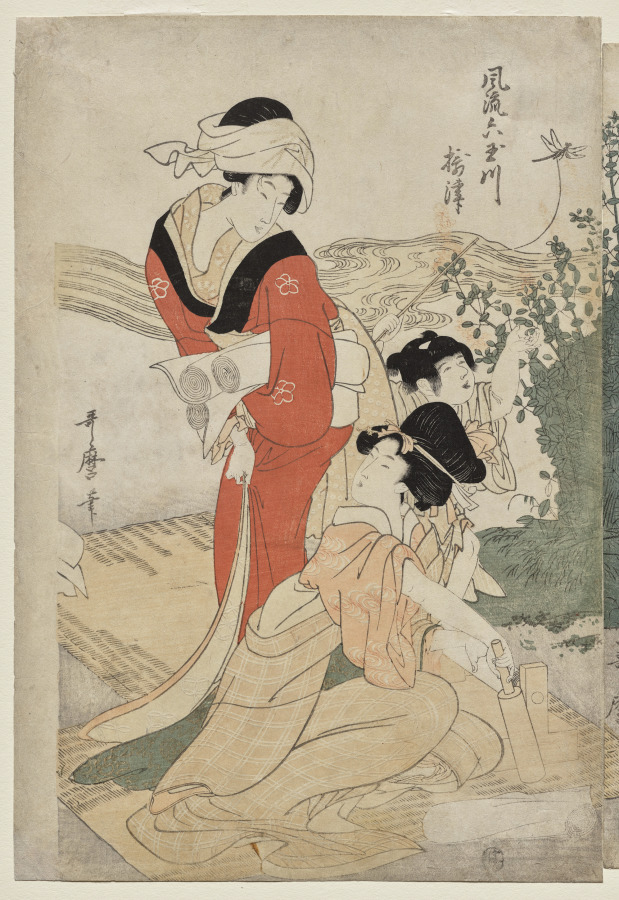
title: Musashi Province from the series Fashionable Six Jewel Rivers (Furyu Mu Tamagawa)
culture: Japan, Edo period (1615–1868)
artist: Kitagawa Utamaro (Japanese, c. 1754–1806)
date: c. 1804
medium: polychrome woodblock print; ink and color on paper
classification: Print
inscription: Signature: Utamaro hitsu Publisher: Maruya Jimpachi (emblem)